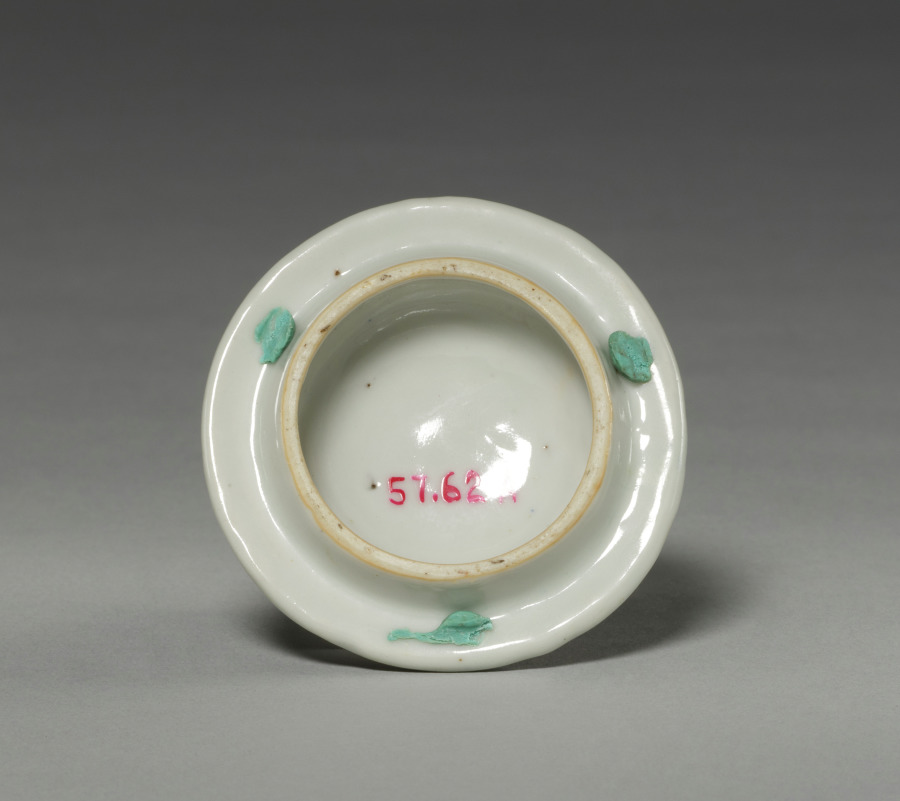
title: Covered Jar (lid)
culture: China, Jiangxi province, Jingdezhen kilns, Ming dynasty (1368-1644), Wanli reign (1573-1620)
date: 1573–1620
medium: porcelain with blue underglaze decoration and overglaze enamels in red, green, and yellow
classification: Ceramic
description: In the Ming (1368–1644) and Qing (1644–1911) dynasties, luxury items became more affordable to larger parts of the society, including women, merchants, and literati in non-official positions. Imperial patronage and a growing urban population encouraged consumption of luxury goods and local craftmanship. This covered porcelain jar has blue underglaze and overglaze in red, green, and blue enamels. It shows Ming dynasty advancements in porcelain decoration and the creative mind of the talented artisans who made it.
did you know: This jar is painted with 16 figures of all ages enjoying a garden setting.